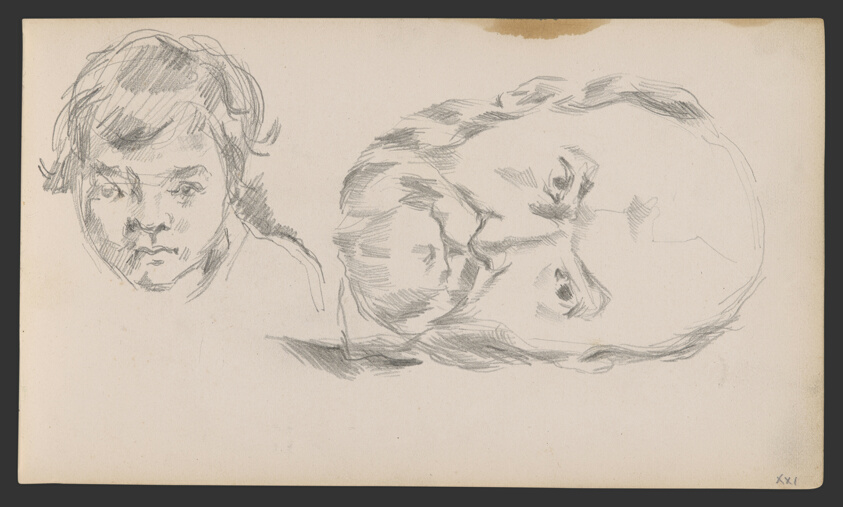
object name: Drawing and Watercolor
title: Sketchbook No. 2 (L'Estaque)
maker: Paul Cézanne; French, 1839-1906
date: 1875–86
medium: Graphite and pen and ink drawings on paper, bound into a book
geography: France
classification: sketchbook; graphite; prints and drawing; paper